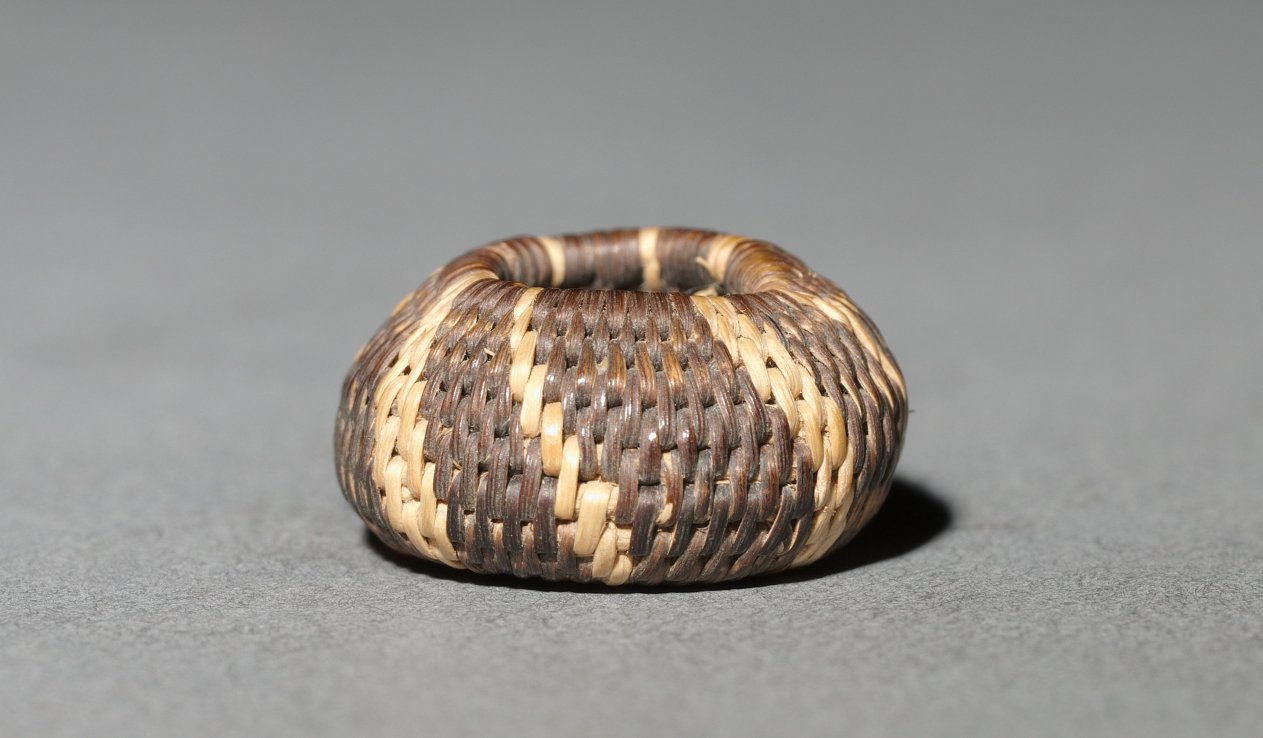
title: Miniature Basket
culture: America, Native North American, Southwest, Arizona, Akimel O'odham (Pima), Unassigned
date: before 1923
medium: plant fiber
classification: Basketry